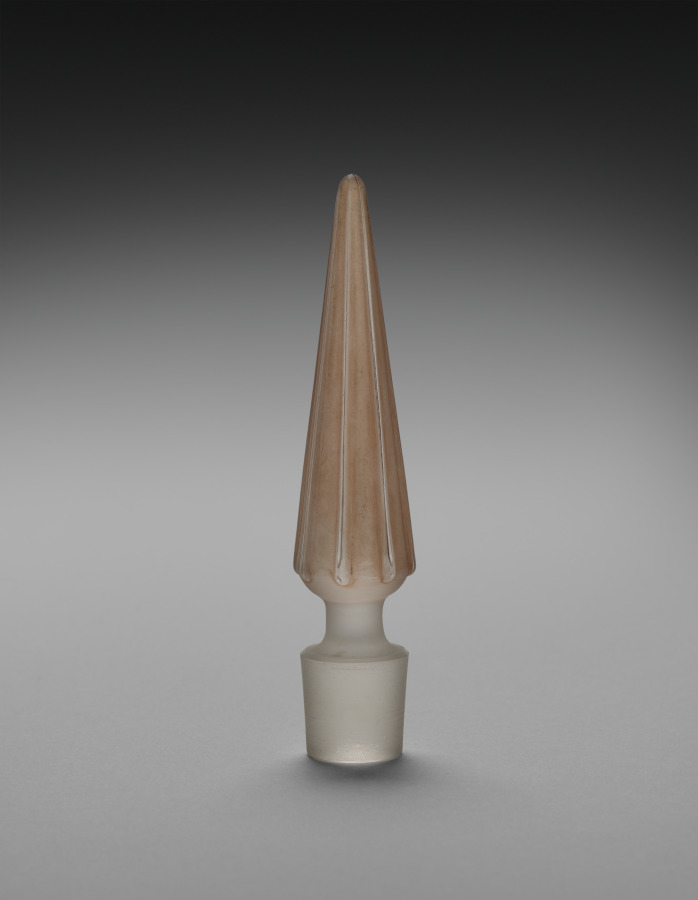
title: Stopper for a Mermaids and Frogs Decanter (Carafe sirènes et grenouilles)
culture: France, 20th century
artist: René Lalique (French, 1860–1945)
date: 1917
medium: glass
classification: Glass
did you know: The title of this work translates to mermaids and frogs carafe.